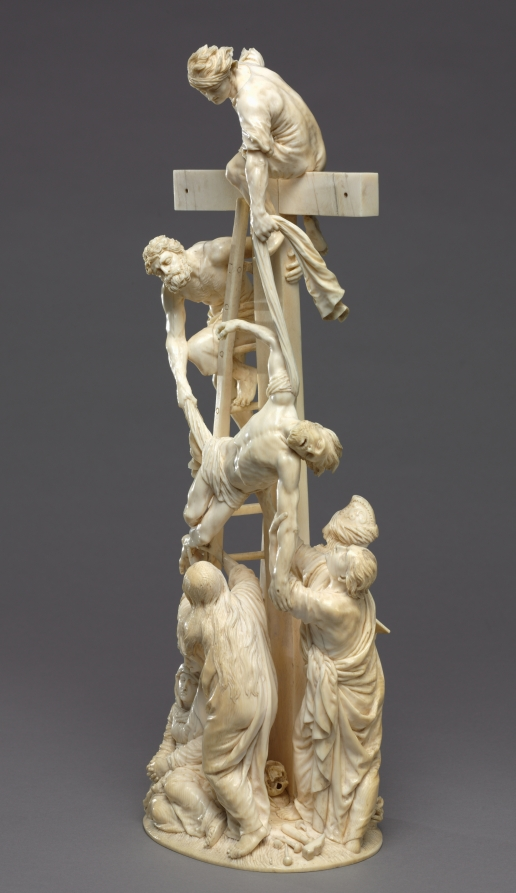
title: Descent from the Cross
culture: Austria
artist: Adam Lenckhardt (German, 1610–1661)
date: 1653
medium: ivory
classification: Sculpture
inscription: inscribed with monogram "AL" conjoined and dated 1653.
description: Carved from a single piece of ivory for Prince Karl Eusebius von Liechtenstein of Vienna, this work is a true tour-de-force. It took Lenckhardt seven years to complete; it is his last known sculpture and the pinnacle of his career. The biblical accounts of the descent from the cross found in the gospels are not consistent, which may contribute to the difficulty in precisely identifying the figures. The Virgin Mary, Saint John, Mary Magdalene, and others were said to be present, but undoubtedly there are other disciples here mourning Christ’s death. The intense emotion registers on the faces of the figures in the scrupulous and exquisitely detailed work.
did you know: Carved from a single elephant tusk, the artist took special care to ensure the ivory did not crack or break as he meticulously crafted each figure in this visually exciting sculpture. Look closely to find tools and small objects included near its base.